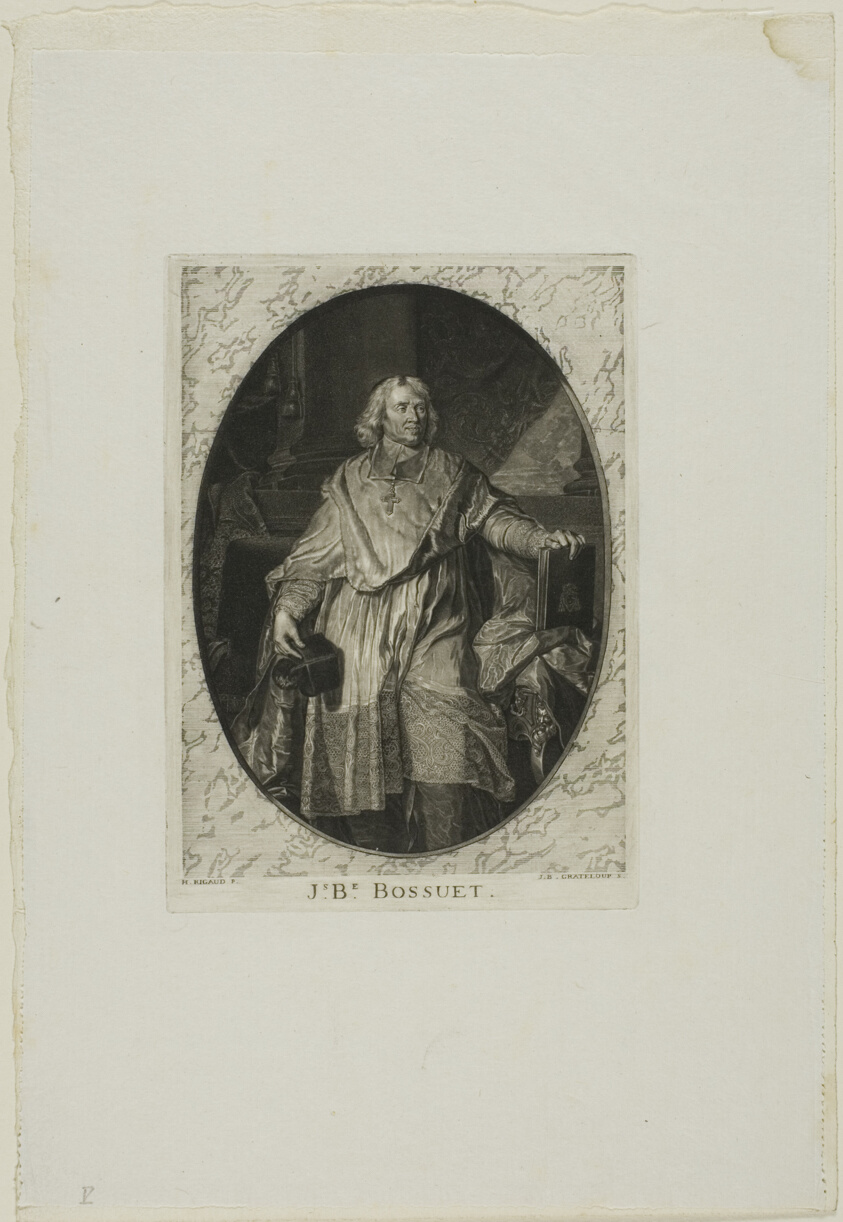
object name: Print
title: J-B. Bossuet: Standing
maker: Jean-Baptiste de Grateloup (French, 1735-1817)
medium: Aquatint on paper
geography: France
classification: aquatint; print; prints and drawing